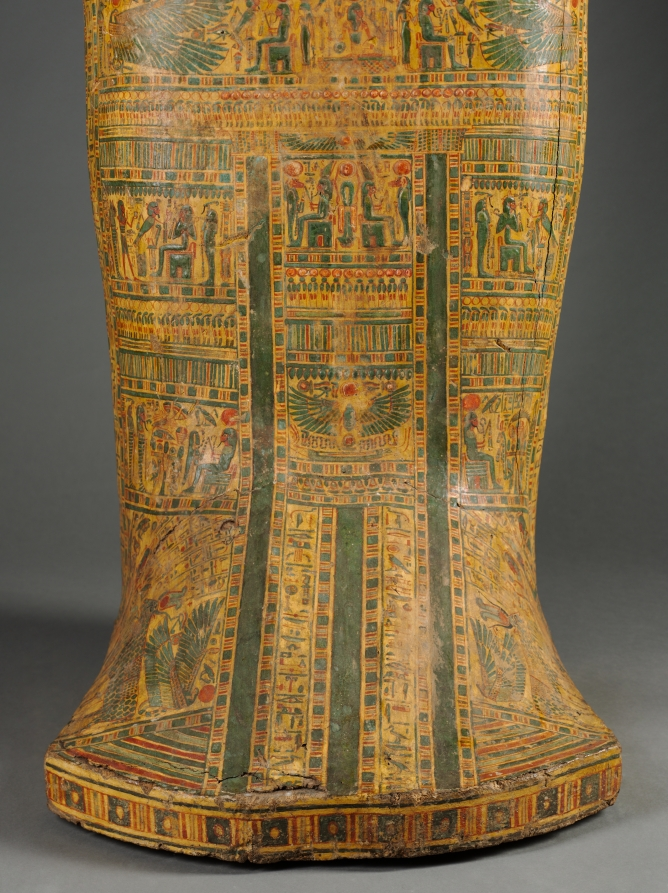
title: Coffin of Bakenmut (lid)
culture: Egypt, Thebes, Third Intermediate (1069–715 BCE), Dynasties 21–22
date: c. 1000–900 BCE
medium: gessoed and painted sycamore fig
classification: Funerary Equipment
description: The coffin of Bakenmut is one of the finest examples of painted wooden coffins made for the priests of Amen and their families at Thebes during Dynasty 21 and early Dynasty 22. The pharaohs of this time were no longer buried in the Valley of the Kings, but instead built tombs in the Delta, far to the north, where they resided. Security was lax in the Theban necropolis. The coffins and funerary goods of the wealthy citizens of Thebes were placed in unmarked and undecorated family tombs cut into the cliffs on the west bank of the Nile. All the care and detail that in more prosperous times were devoted to the decoration of the tomb chapel were now lavished on the elaborately painted coffins. Every available surface is crowded with religious scenes, images of funerary gods and goddesses, protective spells, and magical symbols. The deceased appears mummiform. An elaborate floral collar entirely covers the upper body, exposing only the separately attached hands (now lost). A pair of red "mummy braces" are crossed over the chest, their point of intersection marked by a winged sun disk. The lower body is covered with tiny figures modeled in gesso against a yellow background, which gives the effect of gold inlaid with glass or semiprecious stone. The decoration on the interior features two deified dead kings of Dynasty 18. Although these rulers had lived centuries before, memory of their greatness was still very much alive. The main scene near the top depicts Tuthmosis III, the great military pharaoh, who lived 500 years before Bakenmut. Posed as a mummy, the ruler wears a brilliant feathered garment enfolding him with falcon’s wings. The scene below features back-to-back seated images of Amenhotep I, regarded as the patron of the Theban cemetery and worshiped as a local god there.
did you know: Originally another smaller coffin was placed inside this outer coffin and in that the deceased with a mummy board would have rested.